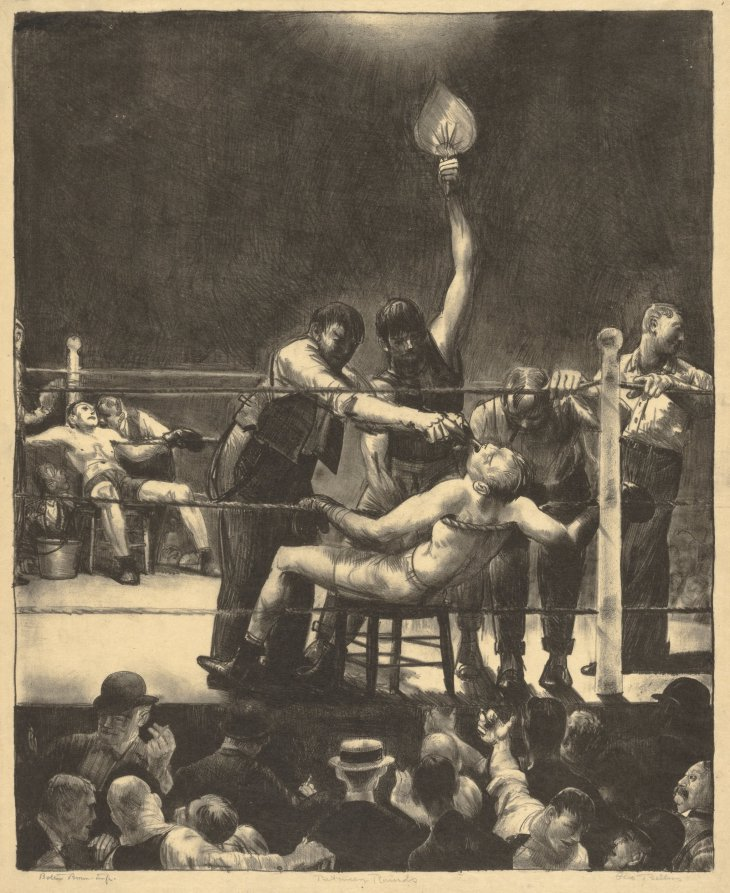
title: Between Rounds, Large, First Stone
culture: America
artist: George Bellows (American, 1882–1925)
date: 1916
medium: lithograph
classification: Print